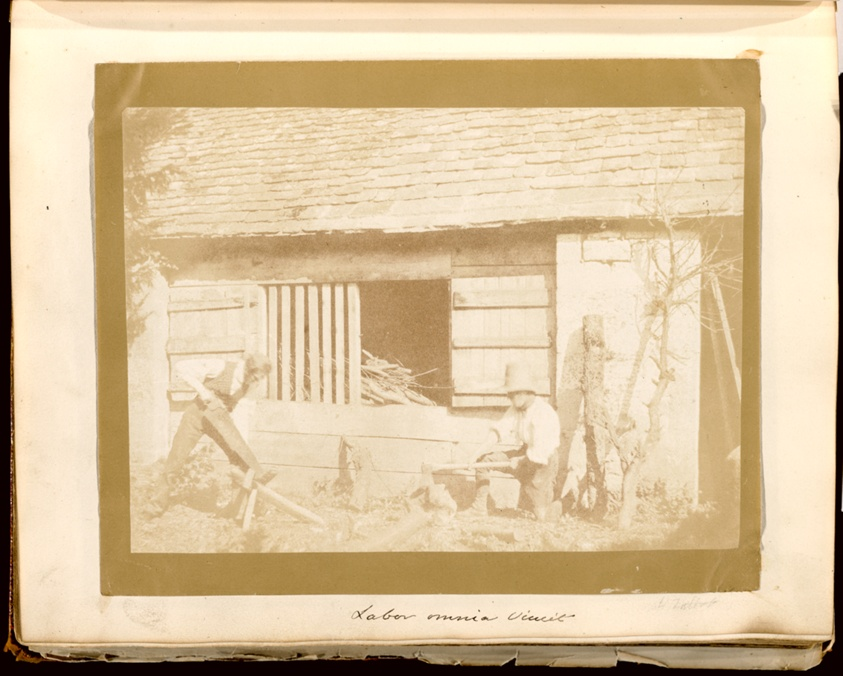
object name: Photograph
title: Untitled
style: 19th century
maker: William Henry Fox Talbot (English, 1800–1877)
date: c. 1845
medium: Salted paper, from the "Untitled Album"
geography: England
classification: photograph; photography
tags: Collected by Hugh Edwards